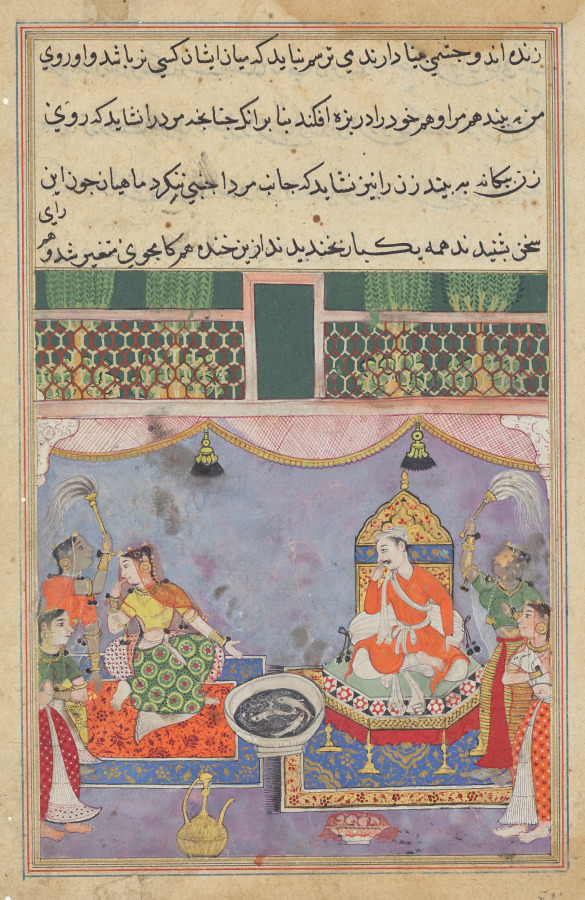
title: Kamjuy, the wife of the Raja, averts her face from the fishes, from a Tuti-nama (Tales of a Parrot): Twenty-third Night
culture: Mughal India, court of Akbar (reigned 1556–1605)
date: c. 1560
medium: gum tempera, ink, and gold on paper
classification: Painting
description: On the left Kamjuy, chief of the Raja’s forty wives, turns away from the bowl of fish and hides her face behind her veil. She claims that it would be sinful to allow any male, even a fish, to see her. To the astonishment of both the Raja and Kamjuy herself, the fish immediately begin to laugh at her assertion.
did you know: Kamjuy and the Raja touch their index fingers to their mouths in gestures of surprise.